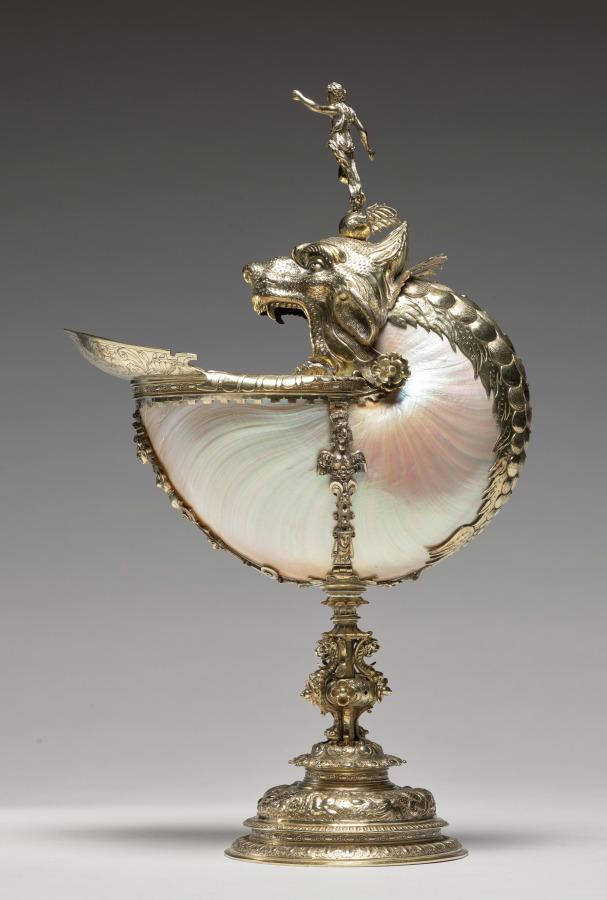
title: Nautilus Cup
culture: Netherlands, Holland, Delft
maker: Cornelis Jansz van der Burch (Dutch, active in Delft, d. 1615)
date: 1607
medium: Silver-gilt, nautilus shell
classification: Metalwork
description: Nautilus shells were brought to the Netherlands from Indonesia. Skilled Dutch silversmiths mounted them in silver, creating luxurious vessels that were sought after by wealthy collectors. Early Dutch nautilus cups are mainly associated with the city of Delft, although only a few other examples made in Delft are known from the late sixteenth and early seventeenth centuries. They feature the dramatic motif of a sea monster’s head.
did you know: The nautilus is a marine mollusk that swims by expelling water from its shell using jet propulsion.